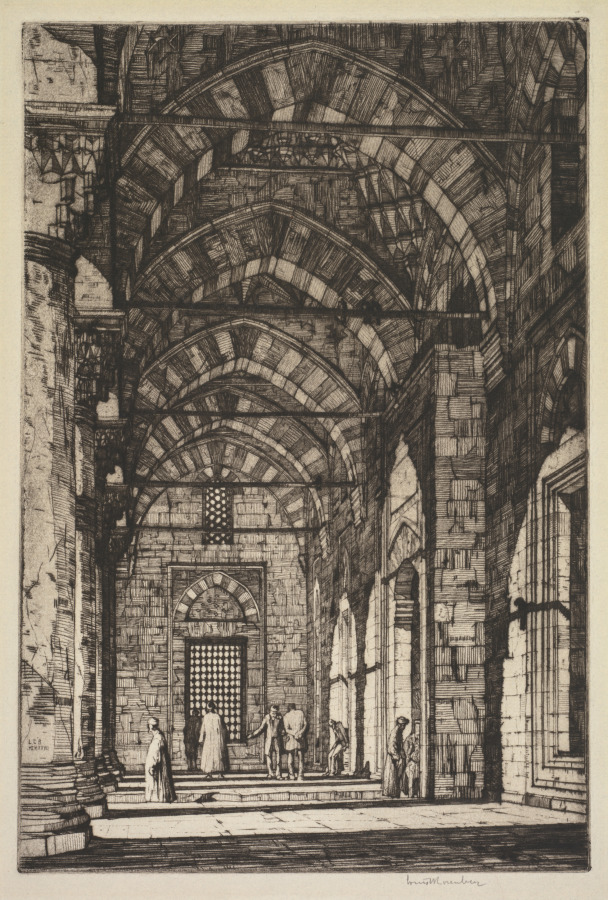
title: Mosque of Sultan Bayazid, Constantinople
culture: America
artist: Louis Conrad Rosenberg (American, 1890–1983)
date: 1927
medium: etching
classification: Print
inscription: Below image, in graphite: Louis C Rosenberg; lower margin, in graphite: Mosque of Sultan Bayazid; on mat, in graphite: U. Oregon Library '78 / Mosque of Sultan Bayazid, Constantinople 8/19/27 Drypoint 7 3/4 x 11/5/8 Ed:England 75/USA 75 (Houlgate) / Am Et